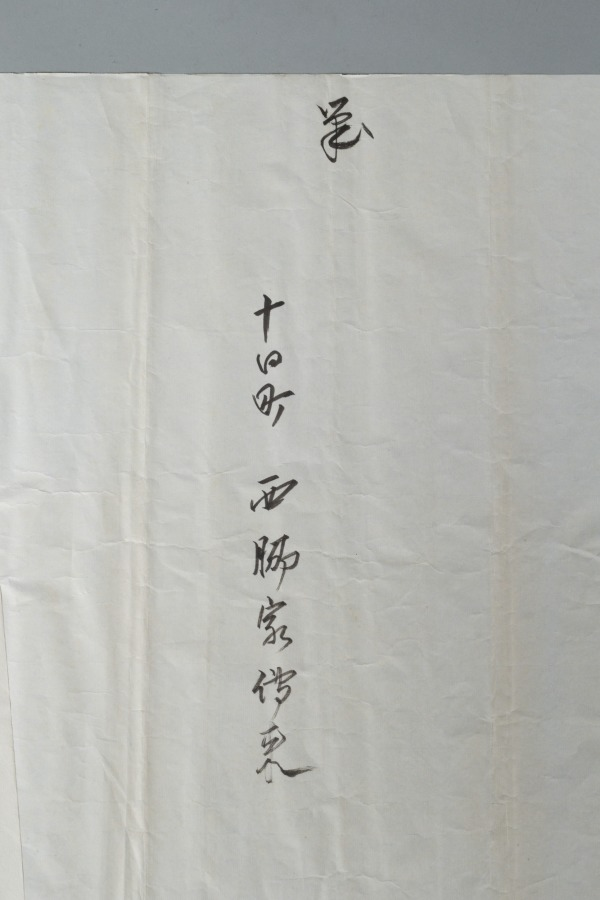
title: Emperor Minghuang Teaching Yang Gueifei to Play the Flute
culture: Japan, Muromachi period (1392–1573)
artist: Choryusai (Japanese)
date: late 1400s–early 1500s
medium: hanging scroll; ink and color on paper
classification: Painting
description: Minghuang, a prominent emperor of Tang (618-906) China and his consort, Yang Gueifei, have inspired many legends, paintings, and poetry in later Chinese culture. Through the study of Chinese literature and the collecting of Chinese paintings, tales of their lives and romance became well-known in Muromachi Japan.